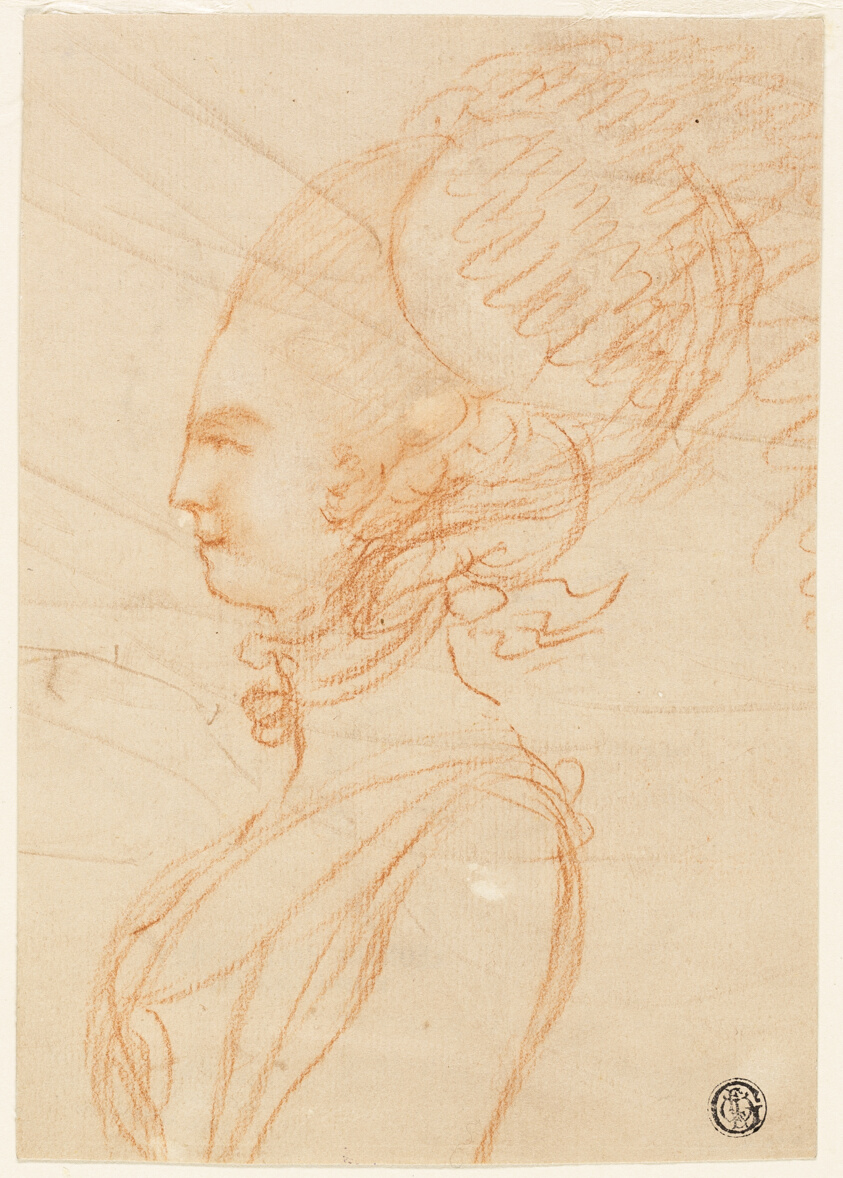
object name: Drawing and Watercolor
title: Half-Length Profile Portrait of a Woman Facing Left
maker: George Romney (English, 1734-1802); or William Hoare (English, c.1707-1792); or James Roberts, the younger (English, active 1766-1809); or Ozias Humphry (English, 1742-1810)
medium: Red chalk on tan laid paper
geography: England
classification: chalk; drawings (visual works); prints and drawing